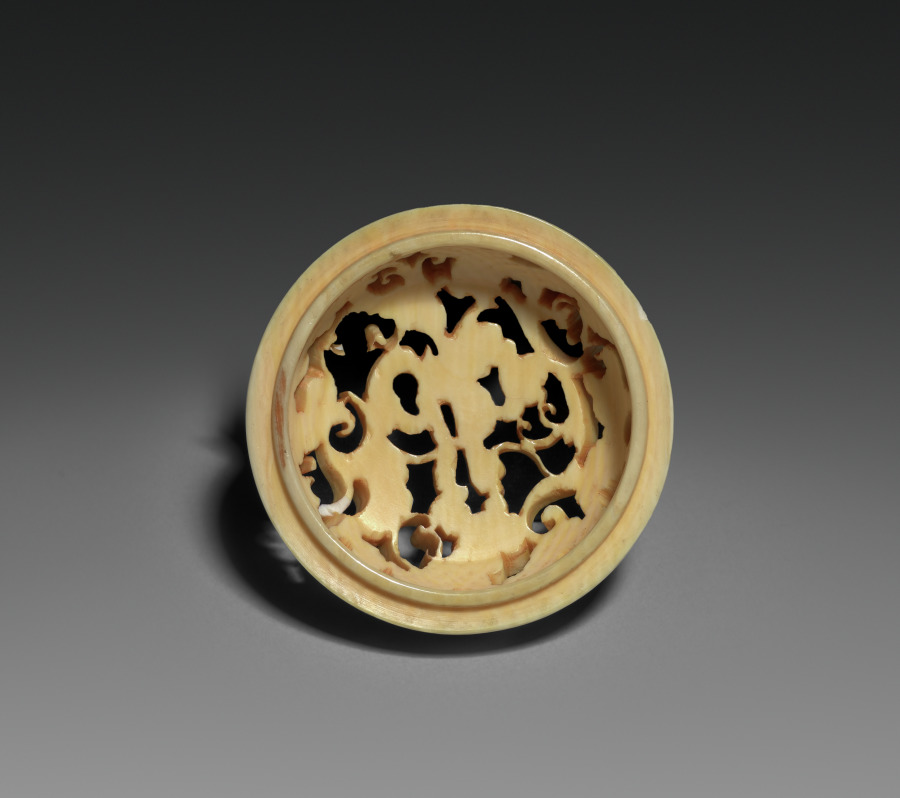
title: Ivory Lid for Water Pot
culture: China, Jiangxi province, Jingdezhen, Qing dynasty (1644-1911), Kangxi period (1662-1722)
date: 1662–1722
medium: ivory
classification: Ceramic